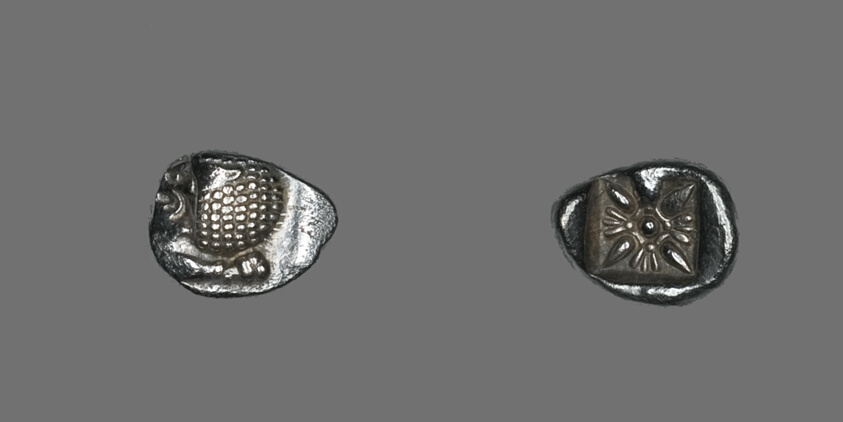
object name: Coin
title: Diobol (Coin) Depicting Forepart of Lion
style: greek, ancient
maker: Greek, Miletus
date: 478 BCE and later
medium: Silver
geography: Miletus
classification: coin; ancient art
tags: lions